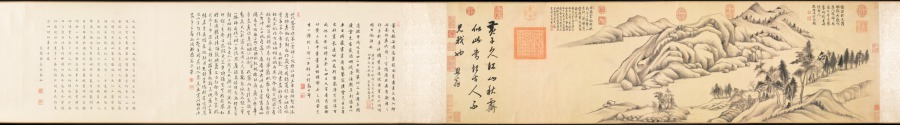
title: River and Mountains on a Clear Autumn Day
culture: China, Ming dynasty (1368–1644)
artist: Dong Qichang (Chinese, 1555–1636)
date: c. 1624–27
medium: Handscroll; ink on Korean paper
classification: Painting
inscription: 黃子久江山秋霽似此，當恨古人不見我也。思翁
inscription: 董文敏每遇高麗鏡面箋，書畫尤為入神。此卷改表紙用之，字跡隱然，兼有朝鮮之印。至於筆法圓秀，真接倪黃。豈文沈所可同日而語也。 康熙庚午中秋後一日，天氣澄爽，重裝初畢，跋於瓶廬。抱瓮翁高士奇。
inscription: Second inscription by Gao Shiqi 高士奇 (1645–1704): On the twenty-third day of the ninth month, the jiaxu year of the Kangxi era [1694], I packed my bags to head north. When my boat passed Wuchang [Suzhou], Mr. Mantang [Song Luo] brought wine to bid me farewell so that we could share our thoughts on our separation in the last few years. I showed him the paintings and calligraphy which I collected and asked his opinions. Since Mr. Mantang does not own any handscrolls by Wenmin [Dong Qichang], I leave this one for him in commemoration of our parting; thus the painting will have a worthy owner and our meeting will become a beautiful story in the future. It is the fourth day after the beginning of winter, with the sky clear and sober. Trees under frost have turned red and yellow, seemingly echoing the brush and ink in the painting. I also ask Mr. Mantang to inscribe a poem to commemorate our meeting so that it will survive forever.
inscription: 1 colophon and 4 seals of Song Luo 宋犖 (1634–1713): Who is the foremost art connoisseur of our dynasty?/ Tangcun [Liang Qingbiao, 1620–1691] is dead, so the title passes to Jiangcun [Gao Shiqi]./ Leaving office, you retired for five years in the Lake region./ Fondling handscrolls and hanging scrolls from morning to evening./ You sent me your collection catalogue Xiao Xia Lu last year;/ It is indeed the true equal of [Zhou Mi's] Yun Yan Guo Yan./ This year you returned to the capital by imperial order;/ Your boat with calligraphy and paintings anchored at the river bank in Suzhou./ When we met each other you did not waste any time for conversation by poured out immediately/ From your "coral net" extraordinary treasures./ You produced incomparable scrolls, with gold-inscribed labels and jade rollers,/ Pouring out from bags and trunks, they were spread in disarray./ Without a word, I rolled and unrolled until my fingers were numbed,/ We sat straight, facing each other quietly, and never felt tired./ For three days we forgot about sleeping and food./ And at times we shouted our joy out loud, forgetting who is host or guest./ Your Dwelling in the Fuchun Mountains and the Yuansheng manuscript/ These peerless works I myself examined with delight./ As an added pleasure to the farewell dinner under the Maple Bridge,/ You allowed me to hold again this handscroll by Dong Qichang--/ The Misty River and Piled Peaks [by Zhao Mengfu] and this Clear Autumn Day are two extraordinary masterpieces./ In showing such life and spirit with "qi yun." the artists were truly "men of heaven."/ The Clear Autumn Day is not even three feet long,/ Painted on tributary Korean paper, it shines like silver./ Every building up and every turn of the mountains imitates nature,/ Every tree and every rock is removed from the commonplace./ From the beginning, the theory of poetry is the theory of painting,/ Like the lotus and the morning sunshine, they complement and refresh each other./ The artist's inscription regrets that "the Old Masters cannot see my scroll."/ Huang Gongwang would have agreed in his grave./ The vermilion of the seals glitter and dazzles the eyes,/ These added accessories are as valuable as jade./ You are very kind to give it to me,/ The feelings expressed in your inscription are so sincere./ Wanting to refuse, but unable, I accept it to respect your wish,/ And taking off my gown and cap I wrapped it with care./ You asked me to write a long poem in commemoration of this beautiful occasion,/ I am too ashamed that my effort in response is so poor and inadequate./ Returning home, I unrolled it under candlelight, trying to write the colophon,/ The light of the waning moon shines at the foot of the mossy wall./ Earnestly humming and brows knit in deep thought, I try to compose;/ The verses are not outstanding, but the facts are real./ With this poem recorded at the end of the scroll, I mail it to you for approval,/ This poem and this painting shall outlast a thousand springs. (Translation by LYSL/HK/WKH)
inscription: 1 colophon and 2 seals of Shao Changheng 邵長蘅 (1637–1704); 2 inscriptions and 14 seals of the Qianlong 乾隆 emperor (r. 1736–95); 1 seal of the Jiaqing 嘉慶 emperor (r. 1796–1820); 3 seals of the Xuantong 宣統 emperor (r. 1908–11); 1 seal unidentified.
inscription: [印] 朝鮮國王之印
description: Dong Qichang had a tremendous impact on the artistic practices and historiography of later generations; his works and writings shaped literati aesthetics. Here, Dong places an abstract landscape composition diagonally across the picture plane, configured to recall earlier masters and simultaneously express his own personal style. Dong’s inscription claims, Huang Gongwang’s Autumn Day, looks like this. I truly regret the master has not seen my work. In fact, Dong Qichang may have had Dong Yuan’s Xiao and Xiang Rivers in mind, a work he owned and considered a key work in Chinese art history.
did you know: The painting has an imprint of a Korean seal that reads "Seal of the king of Joseon."